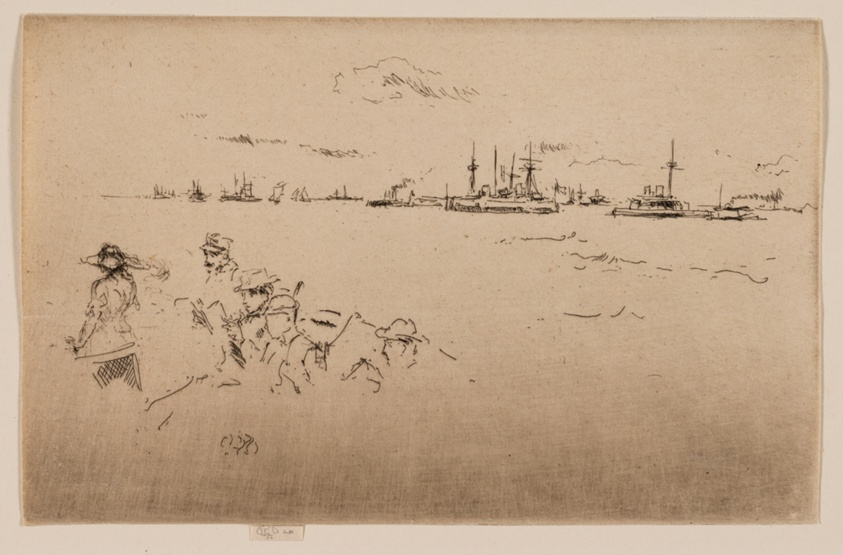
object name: Print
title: The Fleet: Monitors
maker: James McNeill Whistler (American, 1834-1903)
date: 1887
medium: Etching and drypoint with foul biting in black ink on cream laid paper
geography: United States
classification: etching; foul biting; print; prints and drawing; drypoint; paper